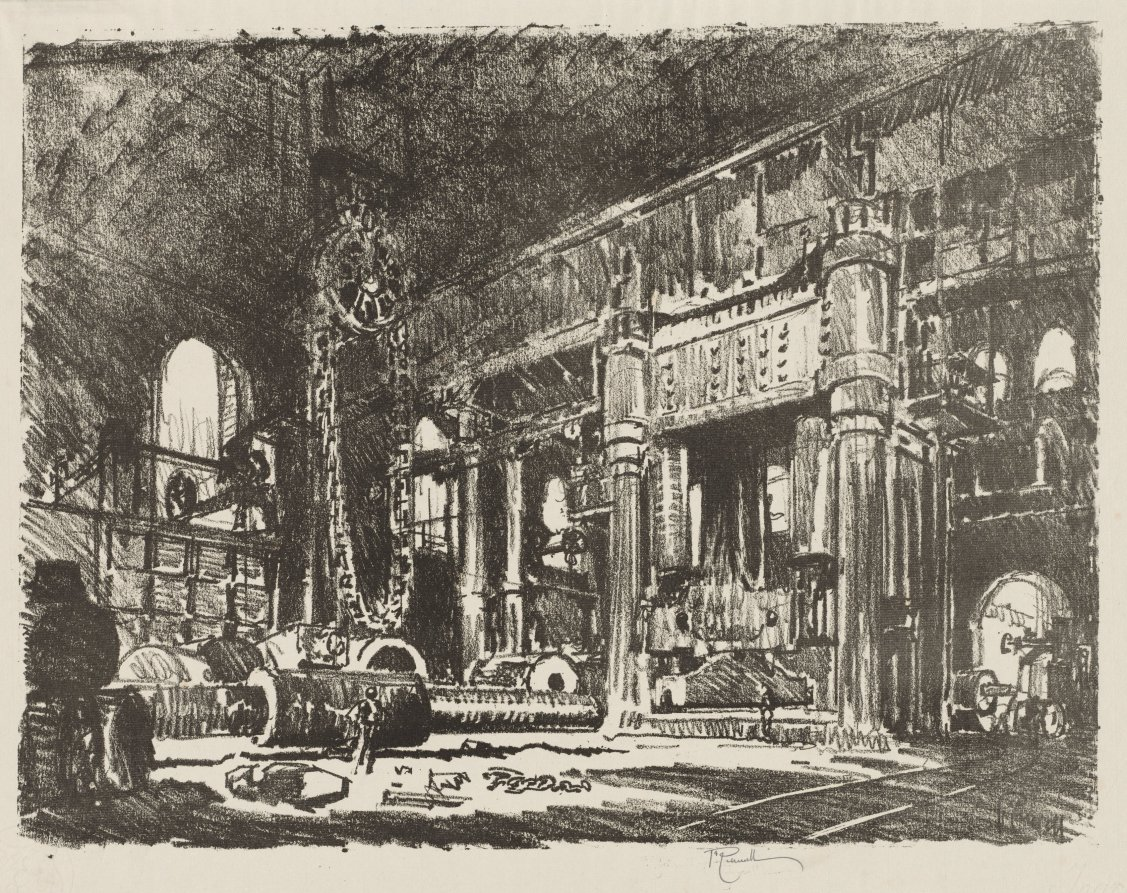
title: English War Work: The Gun Forge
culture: America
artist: Joseph Pennell (American, 1857–1926)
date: 1916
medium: lithograph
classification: Print